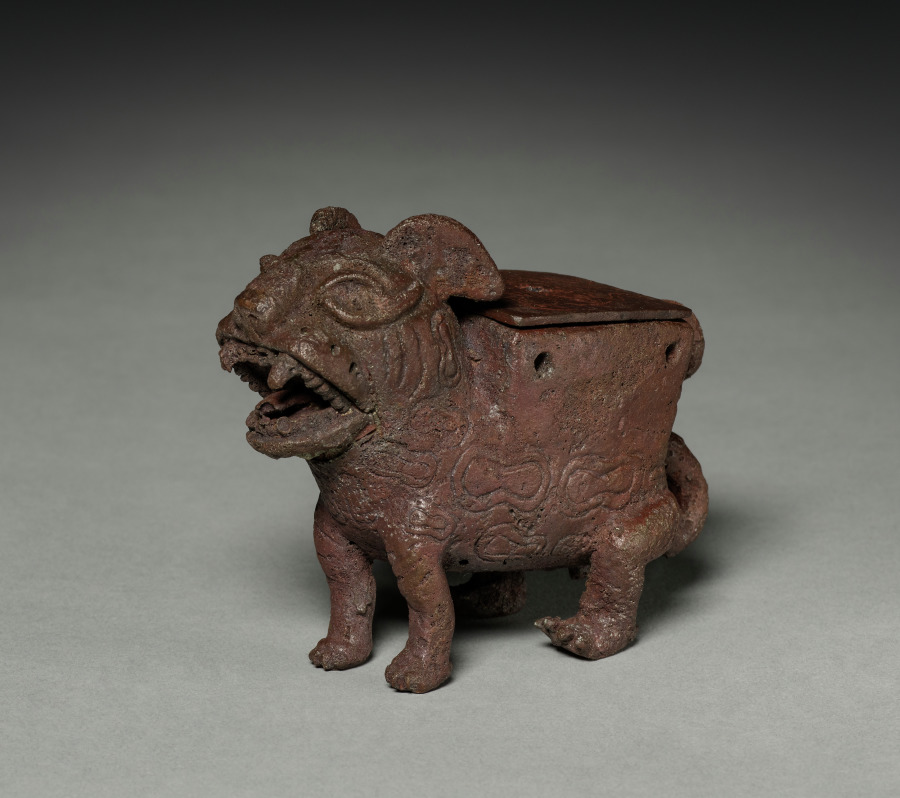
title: Male Feline-Shaped Container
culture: Peru, North Coast, Moche style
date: 50–800 CE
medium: cast copper alloy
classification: Sculpture